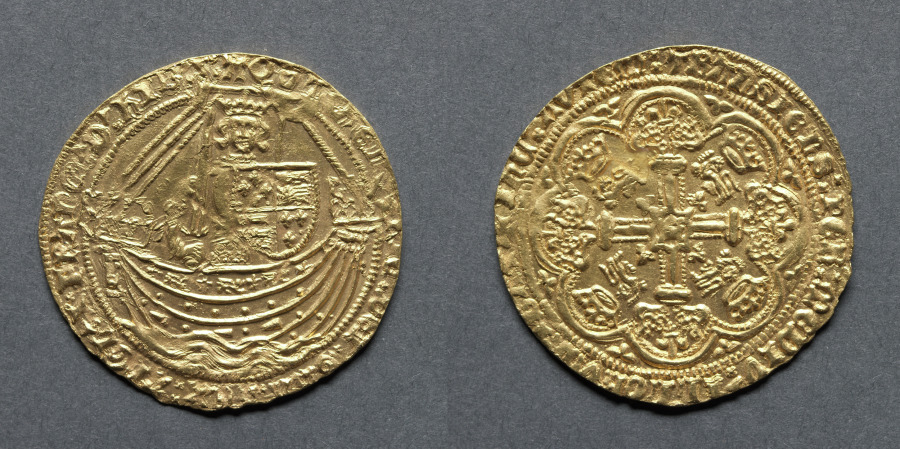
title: Noble: Henry V in Ship with Shield of Arms (obverse); Ornamental Cross with Lis Terminals (reverse)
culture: England, Henry V, 1413-1422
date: 1413–22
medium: gold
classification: Coins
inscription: HENRIC DI GRA REX ANGL X FRANC D HIB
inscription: IHC AUTEM TRANSIENS PER MEDIUM ILLORR IBAT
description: For a considerable time it was impossible to determine which coins belonged to the last part of the reign of Henry IV and which to the first part of the reign of Henry V. However the finding of a hoard of coins in 1929, which contained 63 nobles, resulted in a more correct classification. The importance of finding buried hoards of coins is important to their study. The classification of this coin as class B refers to the type of lettering and markings. There are seven such groups of these coins.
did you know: Henry V's coins are very similar to those of his father; there are seven different varieties of design and style of lettering.